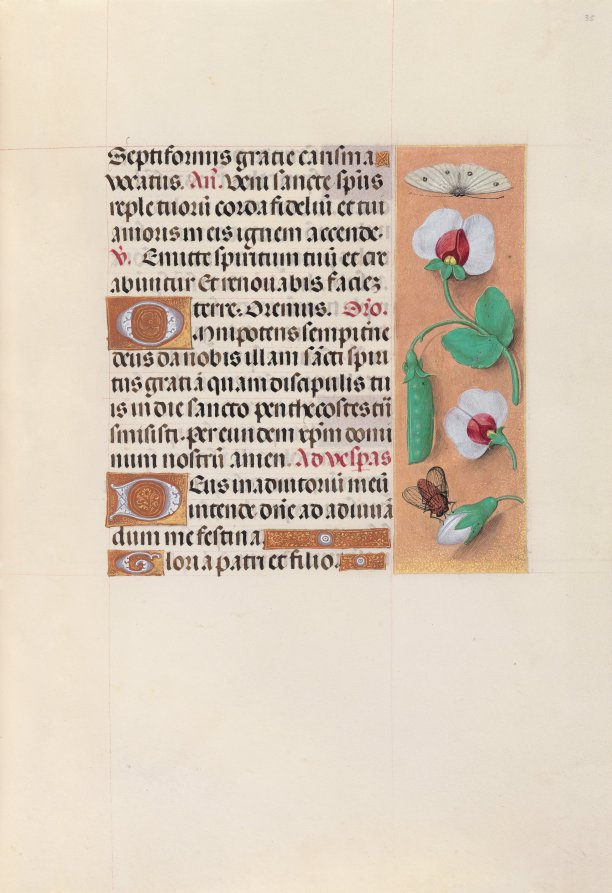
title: Hours of Queen Isabella the Catholic, Queen of Spain: Fol. 35r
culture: Flanders, Ghent and Bruges, late 15th century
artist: Master of the First Prayerbook of Maximillian (Flemish, c. 1444–1519)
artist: and Associates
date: c. 1500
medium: ink, tempera, and gold on vellum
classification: Bound Volume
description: This manuscript was illuminated by a circle of at least five highly organized manuscript painters active in the Flemish cities of Ghent and Bruges. The principal illuminator was Alexander Bening, who painted the majority of the book's miniatures. Manuscripts produced by this circle of artists are renowned for the decoration of their borders, which typically feature a rich variety of realistically-painted flowers, birds, and butterflies. This prayer book, called a book of hours, was intended not for a cleric, but for the private devotions of a lay person-in this case, Isabella the Catholic, Queen of Spain (1451-1504). Isabella's coat of arms embellishes the book's frontispiece. It is unlikely that the book was commissioned by the Queen herself; rather, she probably received it as a diplomatic gift from someone courting her patronage, perhaps Cardinal Francisco Jimenez de Cisneros. A Franciscan friar, Jimenez was dependent upon Isabella for his advancement, first to the post of Queen's confessor in 1492, and then to Archbishop of Toledo in 1495.